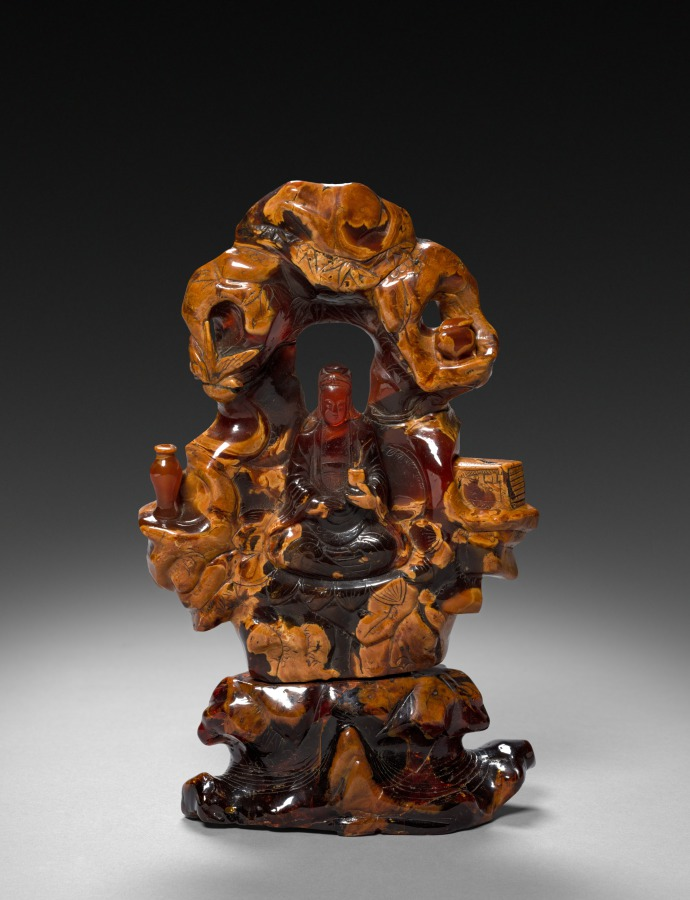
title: Bodhisattva Guanyin Seated in a Rock Grove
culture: China, Qing dynasty (1644-1911)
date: 1675–1700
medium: opaque ochre and translucent red-orange amber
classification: Sculpture